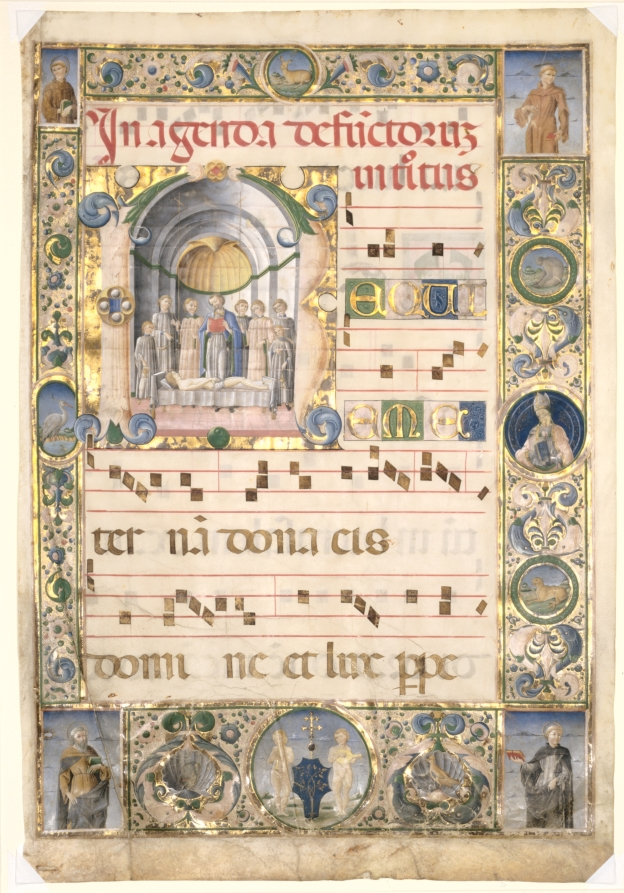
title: Leaf from a Gradual: Initial (R) with Mass for the Dead (recto)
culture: Italy, Ferrara, 15th century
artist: Jacopo Filippo d' Argenta (Italian, 1501)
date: c. 1480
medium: ink, tempera, and gold on parchment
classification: Manuscript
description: This leaf was excised from a volume of a large set of choral books known to have been commissioned by Bartolomeo delle Rovere for Ferrara Cathedral. Delle Rovere, nephew of Pope Sixtus IV, was the Bishop of Ferrara from 1474 to 1494 and his arms appear in the rondel at the bottom of the page: a shield bearing an oak tree (rovere in Italian) surmounted by a patriarchal cross, the symbol of his rank and authority. Payment records indicate that Argenta worked on the choir books for Ferrara Cathedral from 1478 to 1486. The large historiated initial R dominates the extensive decoration including a realistically painted scene in which a priest (center) surrounded by acolytes stands over the body of the deceased as he reads the Office of the Dead. The ceremony takes place within a vaulted chapel that recedes in space to create the illusion of perspective.